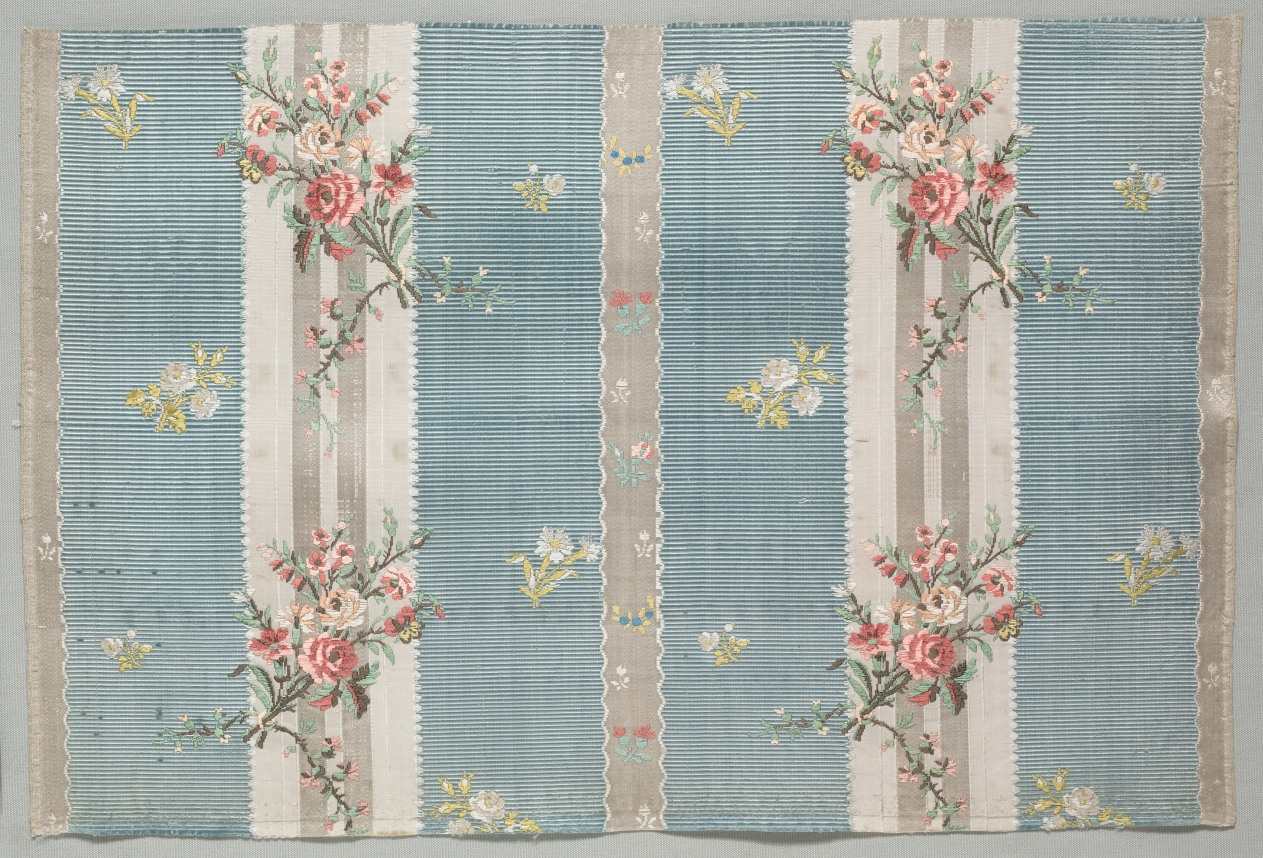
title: Taffeta Fragment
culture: France, late 18th century, Period of Louis XVI (1774-1793)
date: late 1700s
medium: taffeta, warp-patterned and brocaded; silk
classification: Textile